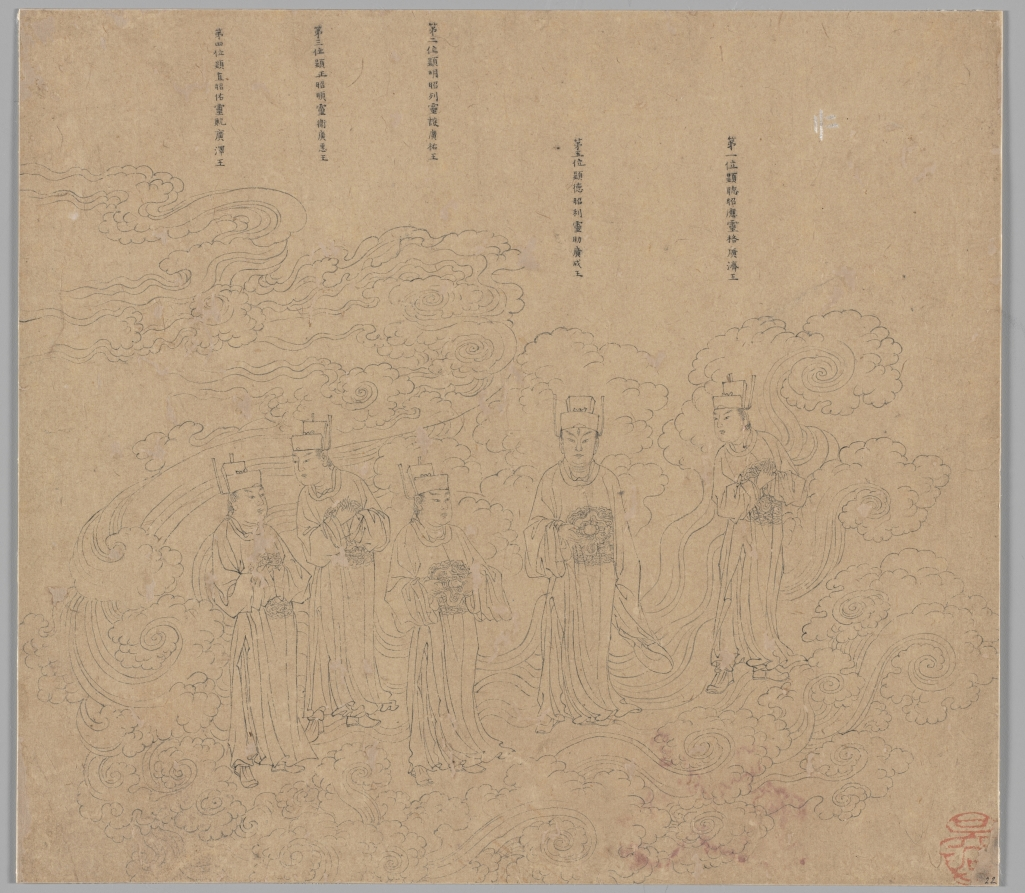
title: Album of Daoist and Buddhist Themes: Procession of Daoist Deities: Leaf 22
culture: China, Southern Song dynasty (1127-1279)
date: 1200s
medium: Album, ink on paper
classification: Painting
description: This leaf is part of an important album of 50 drawings encompassing three subjects: processions of Daoist deities to the celestial spheres, the Ten Kings of Hell, and Erlang’s Campaign to Rid Mount Guankou of Dangerous Beasts (soushan tu 搜山圖). This section of the Daoist pantheon shows a group of “kings” known as the Five Manifestations (right to left): Guangji 廣濟王, Guangcheng 廣成王, Guangyou 廣祐王, Guanghui 廣惠王, and Guangze 廣澤王. The artist chose for an unknown reason to put the fifth king, Guocheng, between kings number 1 and number 2.